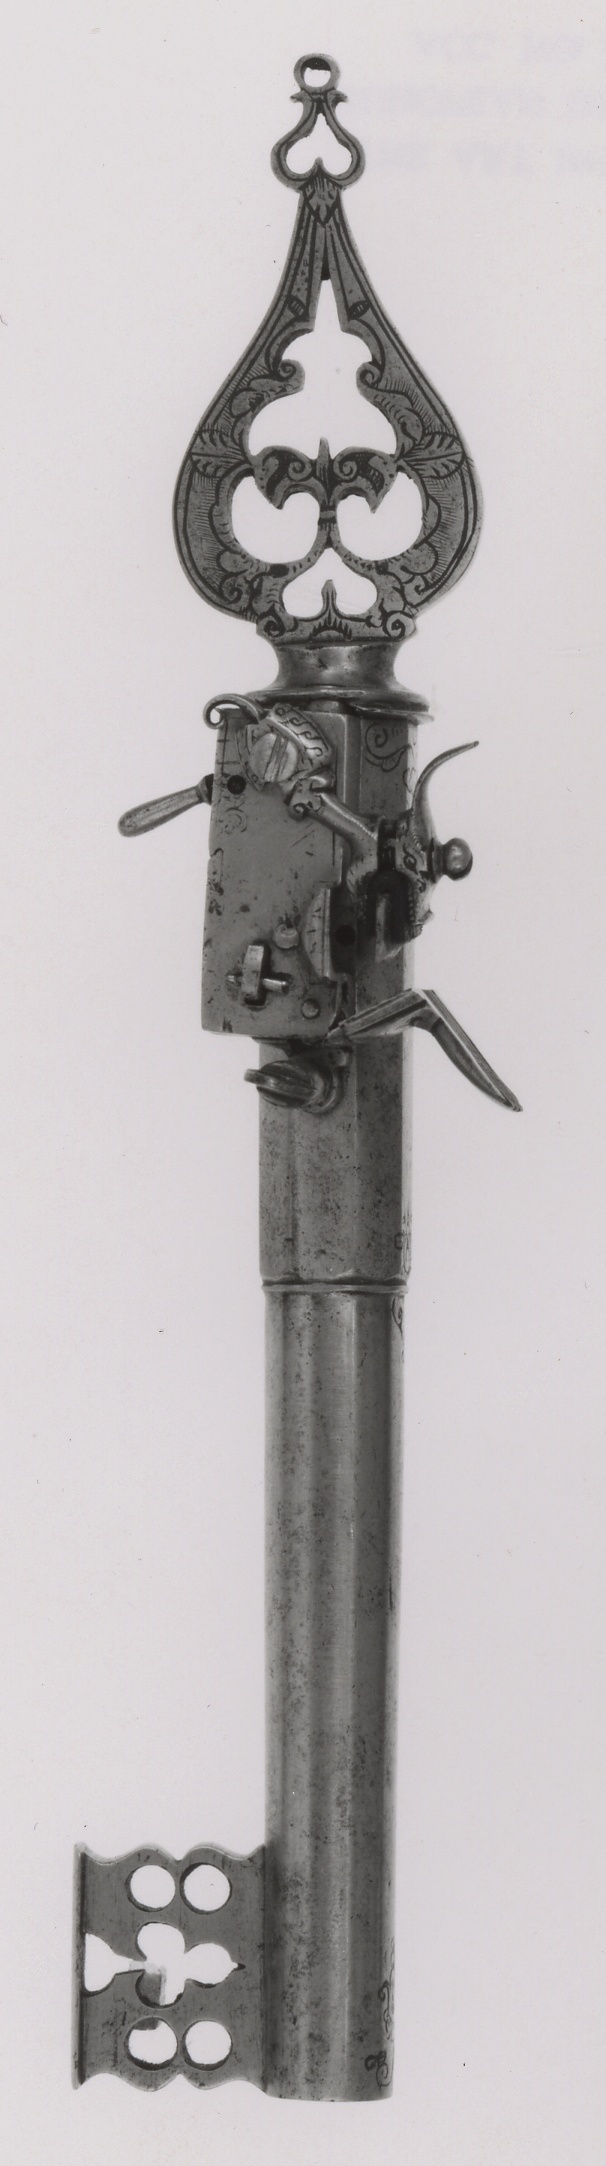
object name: Arms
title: Door Key with Flintlock Pistol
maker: Italian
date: 1600/1700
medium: Steel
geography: Italy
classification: combination weapon; arms; arms and armor